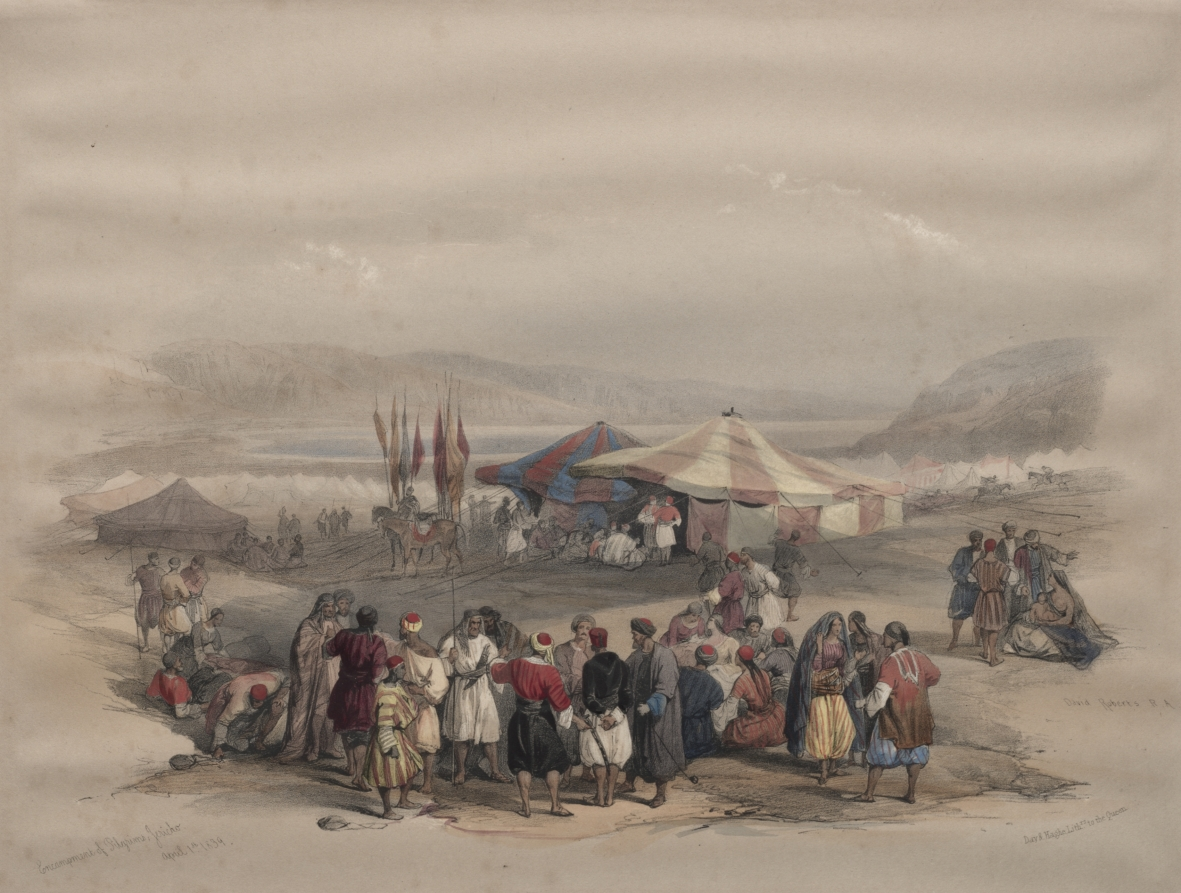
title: Encampment of Pilgrims, Jericho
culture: England, 19th century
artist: David Roberts (Scottish, 1796–1864)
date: 1839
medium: color lithograph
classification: Print